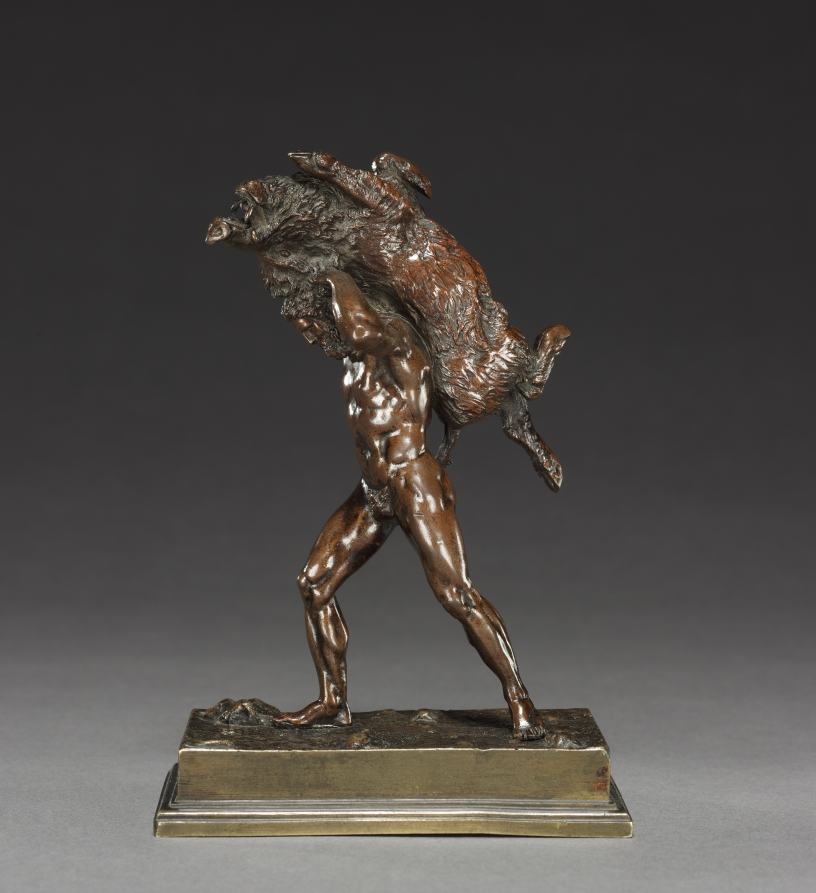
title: Hercules Carrying the Erymanthean Boar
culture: France, 19th century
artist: Antoine-Louis Barye (French, 1796–1875)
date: c. 1820–1830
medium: bronze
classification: Sculpture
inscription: signed on base: "BARYE."